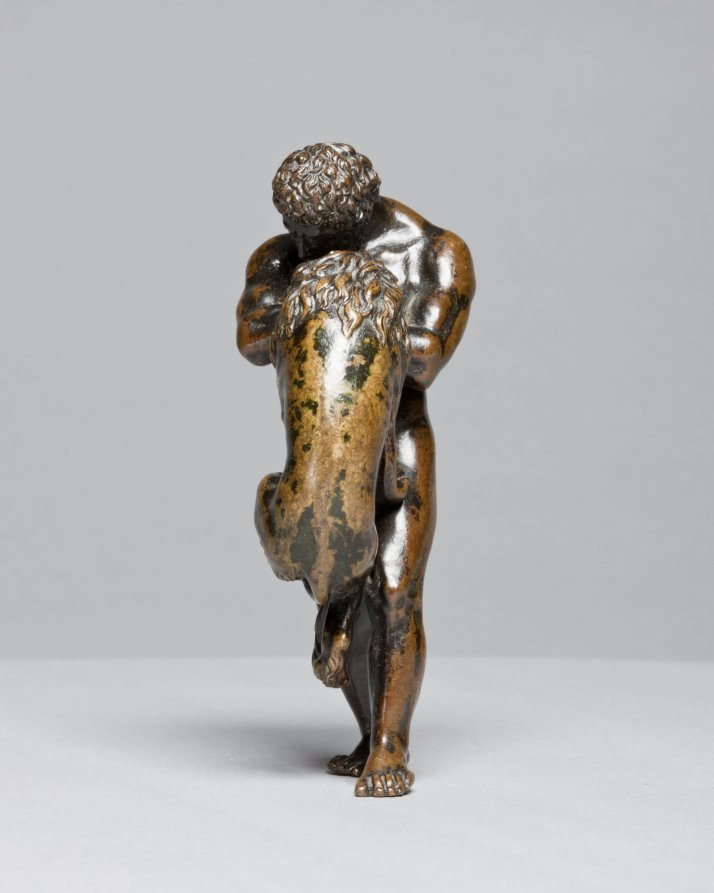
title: Hercules and the Nemean Lion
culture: Italy or France, 16th century or later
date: 1500s or later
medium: bronze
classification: Sculpture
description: The original owner of this work would have understood that this scene referred to the entire story of Hercules, the demi-god who had to accomplish twelve labors. The lion is named after the city of Nemea, near Corinth, a monstrous beast sent by the goddess Hera to wreak havoc on the area. After killing the lion, Hercules wore his pelt, commonly seen in other representations of the hero.